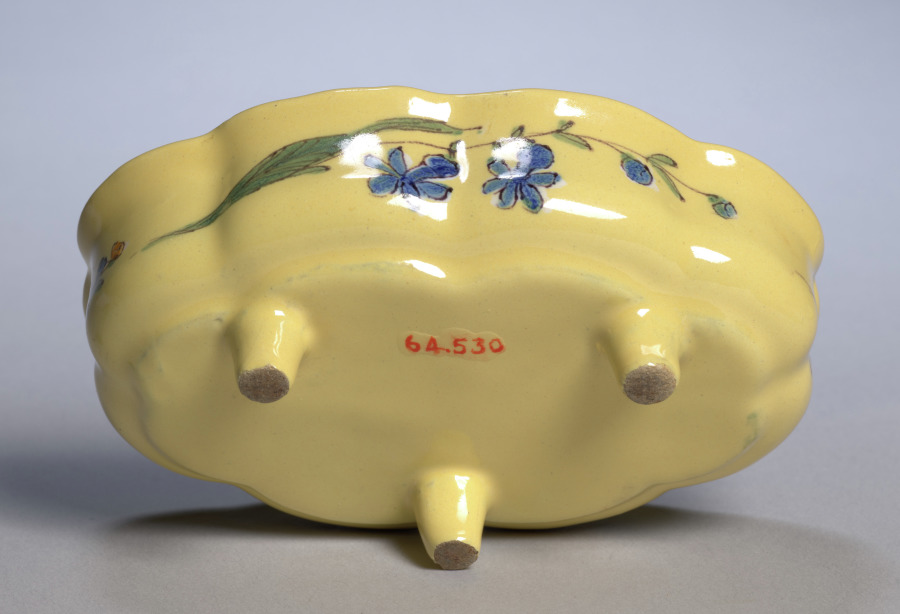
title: Spice Bowl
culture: France, Montpellier, 18th century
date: c. 1775–80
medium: faience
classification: Ceramic